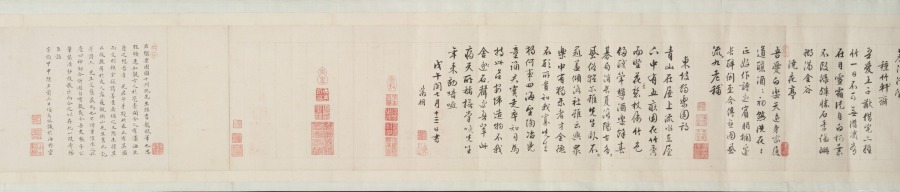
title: Garden for Solitary Enjoyment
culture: China, Ming dynasty (1368–1644)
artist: Qiu Ying (Chinese, 1494–1552)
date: 1515–52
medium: Handscroll; ink and light color on silk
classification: Painting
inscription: Accompanying text of an essay together with seven poems of Sima Guang (1019–1086) and one poem of Su Shi (1037–1101) written by Wen Zhengming (1470–1559) in 1558.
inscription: 2 colophons and 82 seals: 4 seals of Wen Zhengming 文徵明 (1470–1559); 59 seals of Xiang Yuanbian 項元汴 (1525–1590); 1 colophon, dated 1644, and 7 seals of Xiang Yukui 項禹揆 (c. late 1500s–1659); 1 colophon, dated 1880, and 2 seals of Weng Tonghe 翁同龢 (1830–1904); 2 seals of Ch'eng Chen-i (19th c.); 1 seal of Han Ch'ung (19th c.); 4 seals of Wan-go H. C. Weng 翁萬戈 (1918–2020); 3 seals unidentified.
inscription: Colophon by Xiang Yukui 項禹揆 (c. late 1500s–1659): The painting of The Garden for Self-enjoyment on the right by Shih-chou, Mr. Qiu [Qiu Ying] is in the style of Li Lung-mien. Its mood is peaceful, as if meeting the ancient gentlemen face to face among the brushes and silk; it lifts one above the sordid bustle of life. Formerly, my late father handed me this scroll which had only the painting without the written essay. I considered asking a good calligrapher to write the essay to add to it but was afraid that the quality of the writing would not match the painting. Several years later, I saw at a friend's house this essay and poems (of Ssu-ma Kuang] written by Hengshan [Wen Zhengming], once owned by my grandfather; so I spared no expense to obtain it. I rejoiced at this and said: "The divine swords are finally united. How things are pre-destined!" Now my friend Chang Kung-chao's technique for mounting [painting and calligraphy] is excellent. Therefore by daring to take them out and join them together, I can preserve this beautiful story of singular reunion. Xiang Yukui recorded at Hai-yeh-t'ang [hall] two days before New Year's Eve in the jiasheng year of the Chongzhen era [1644]. trans. LYSL/HK/WKH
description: Garden of Solitary Enjoyment refers to a site built in 1073 by the statesman Sima Guang (1019–1086) after he had retired to Luoyang, Henan province. Every spring, visitors would flock to his garden. Each of its seven structures references a historic figure. Sima wrote: I channel streams [like Du Mu], to water flowers [like Bai Juyi], or trim bamboo [like Wang Huizhi]. . . . I know of no joy between heaven and earth that could take its place. Qiu Ying’s painting, created after an 11th-century version of the same theme, must have appealed to garden owners of the Ming dynasty, since it became the template for numerous Suzhou workshop copies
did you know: Sima Guang completed his monumental survey of Chinese history, Zizhi tongjian, in the garden depicted in this painting.